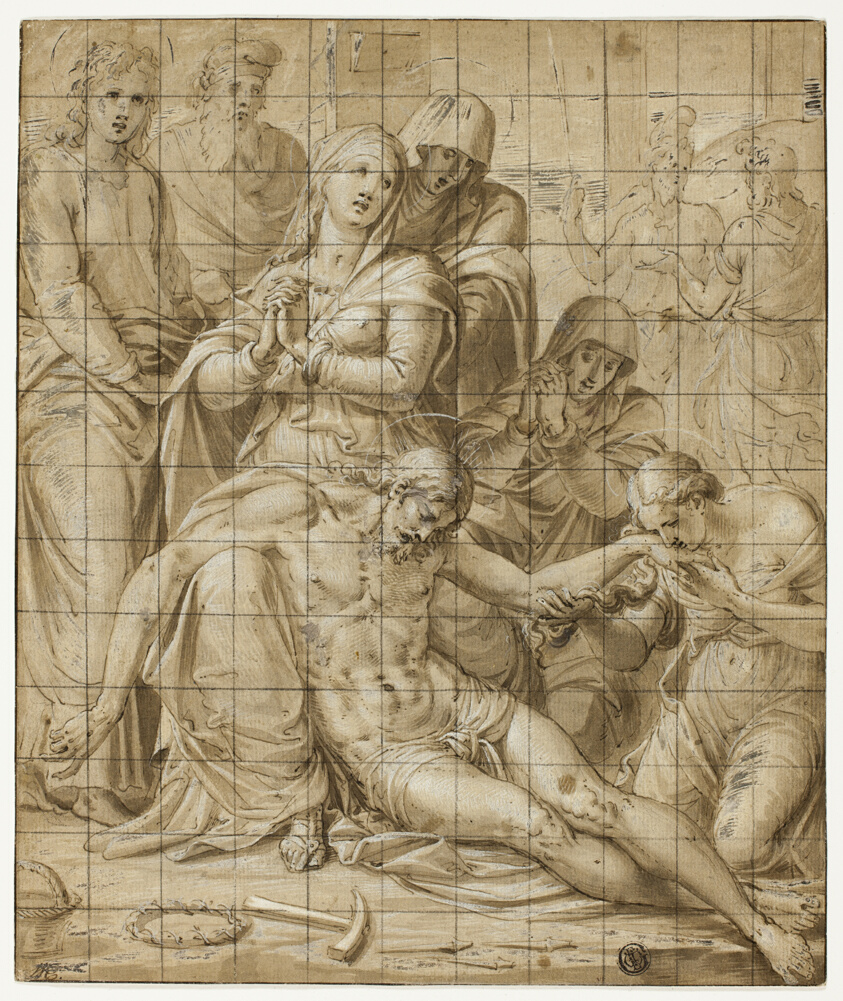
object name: Drawing and Watercolor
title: The Lamentation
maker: Luca Penni (Italian, 1500/04-1557)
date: 1540/46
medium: Pen and brown ink and brush and brown wash, heightened with lead white (partly oxidized), on buff laid paper, squared in graphite, laid down on ivory laid paper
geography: Italy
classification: ink and wash; drawings (visual works); prints and drawing